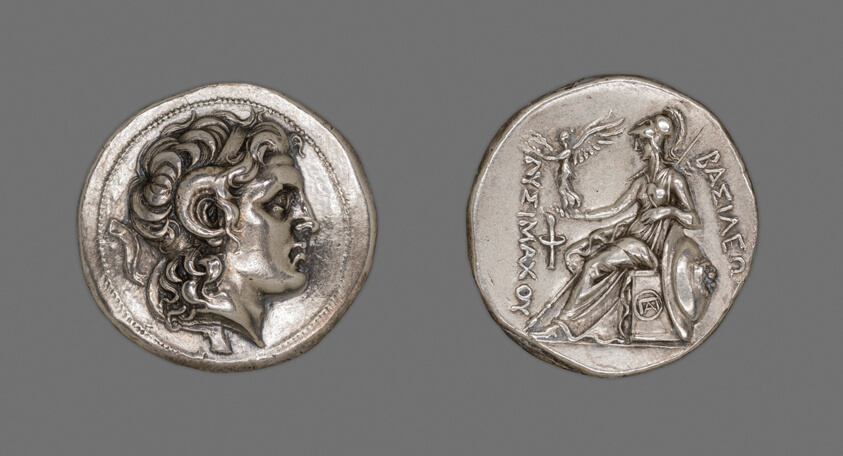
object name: Coin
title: Tetradrachm (Coin) Portraying Alexander the Great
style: hellenistic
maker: Greek; minted in Ephesus, Asia Minor (modern Turkey)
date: 297-281 BCE, issued by King Lysimachus of Thrace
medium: Silver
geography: Ephesus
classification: coin; ancient art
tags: alexander the great, victory, spears, helmets, shields, Athena